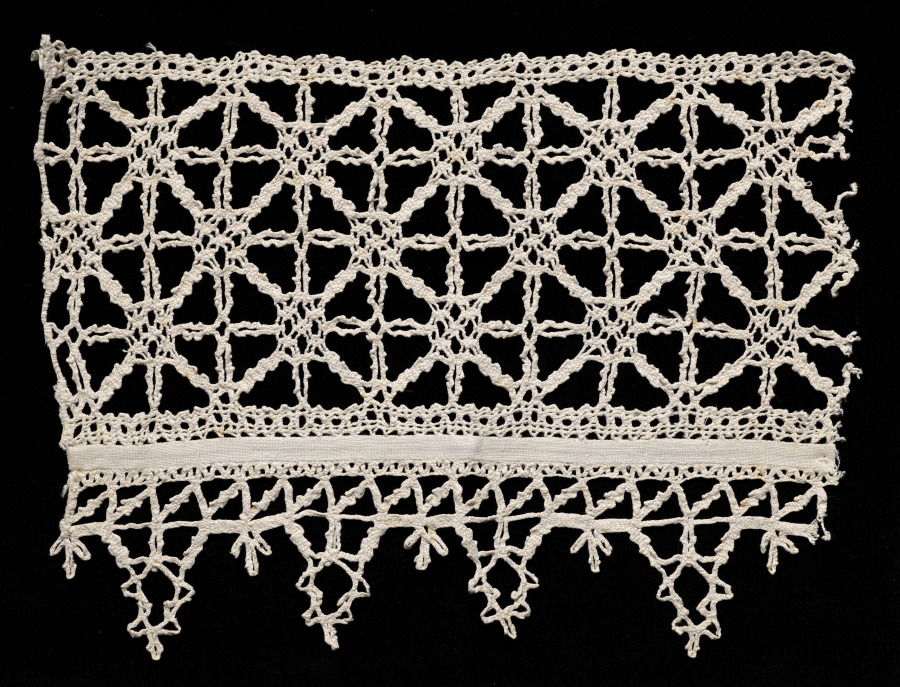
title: Lace Insertion with Edging of Points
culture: Italy, Venice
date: 1540–60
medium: Bobbin lace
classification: Lace